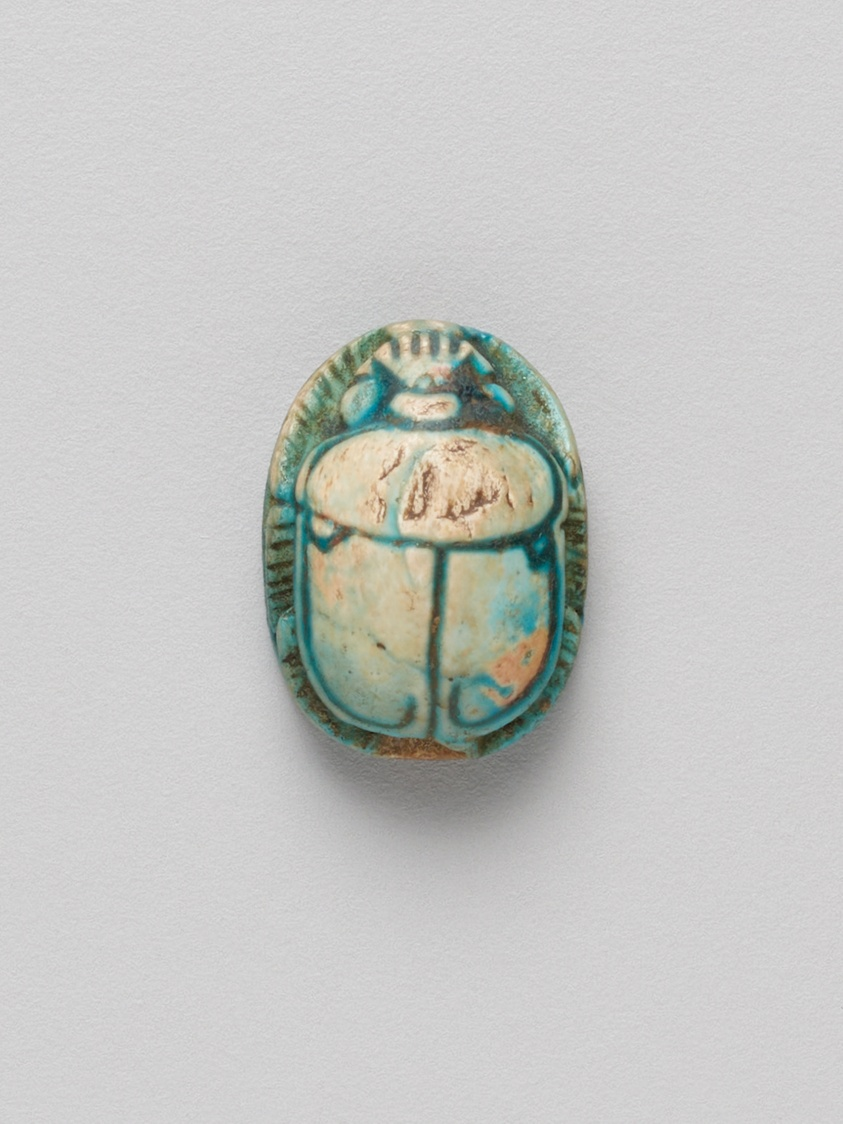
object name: Costume and Accessories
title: Scarab Depicting Ptah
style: new kingdom, ramesside period, ancient, nineteenth dynasty, egyptian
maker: Egyptian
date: New Kingdom, Dynasty 19, Reign of Ramesses II (about 1279–1213 BCE)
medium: Glazed steatite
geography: Egypt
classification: scarab; ancient art; costume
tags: scarab beetle, pharaohs, kings, king, Hieroglyphs, gods (deities), deities